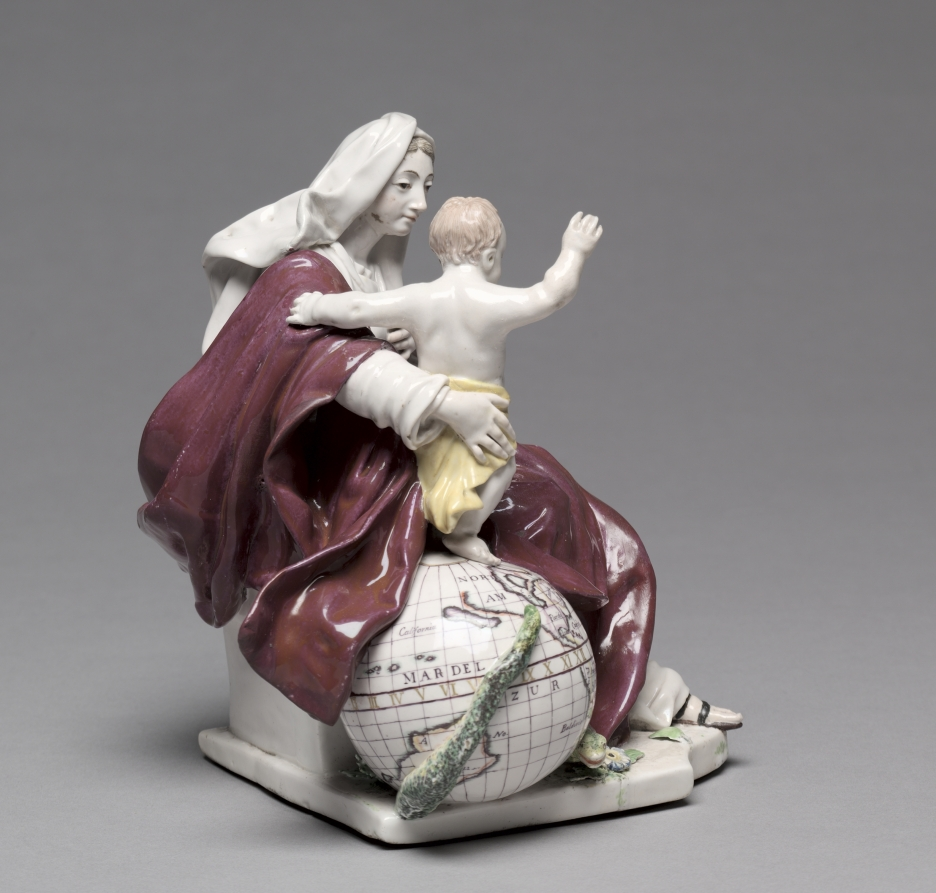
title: Madonna and Child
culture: England, Chelsea, 18th century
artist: Chelsea Porcelain Factory (Britain, London, 1745–84)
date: c. 1755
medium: porcelain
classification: Ceramic